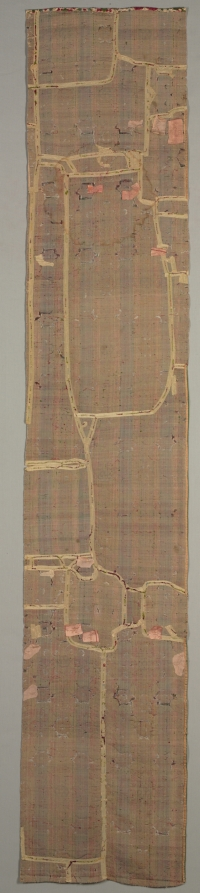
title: Four-color Velvet with Medici Armorial in Rosettes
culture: Italy, Florence, 15th century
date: 1450–1500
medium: silk, velvet: cut pile and voided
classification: Velvet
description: This polychrome velvet displays the heraldic design of the Medici family of Florence, where it was probably made. The device of crimson balls on a yellow ground appears in the centers of the colorful rosettes. Gilt-metal thread forms the heraldic ground in more lavish examples. The striped selvage helps identify the late 15th-century dating. The rosette pattern created with four colors of pile warp is silhouetted on the ivory satin weave foundation, known as voided velvet. Its color scheme and tile-like design have often been associated with influence from Islamic lands, most likely Turkey.